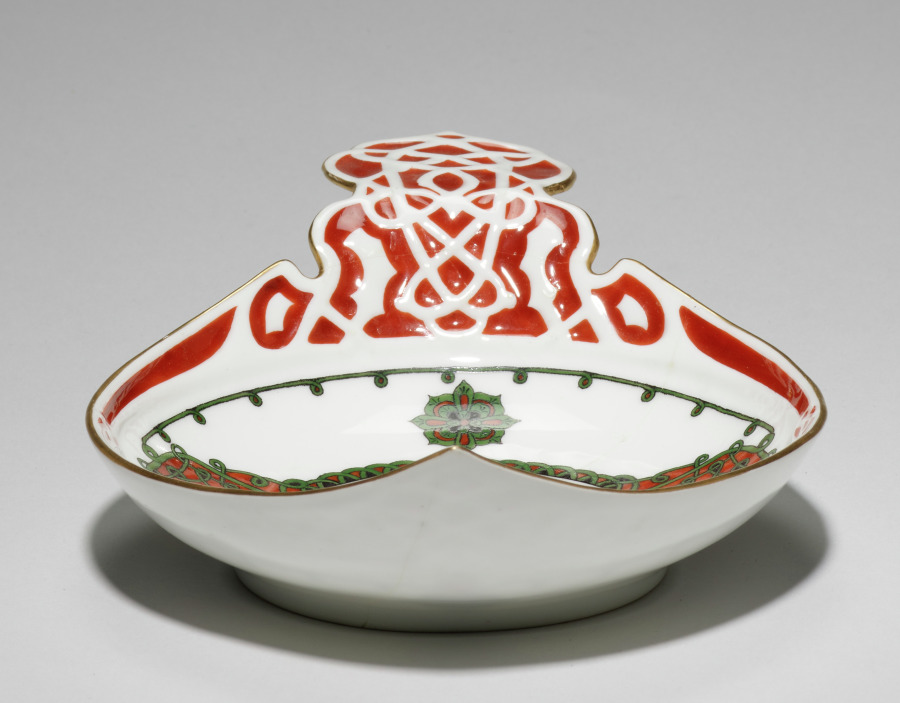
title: Cup (Kovsh)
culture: Russia, St. Petersburg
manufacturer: Kornilov Brothers (Russian, established 1835)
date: 1893–1917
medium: porcelain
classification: Ceramic